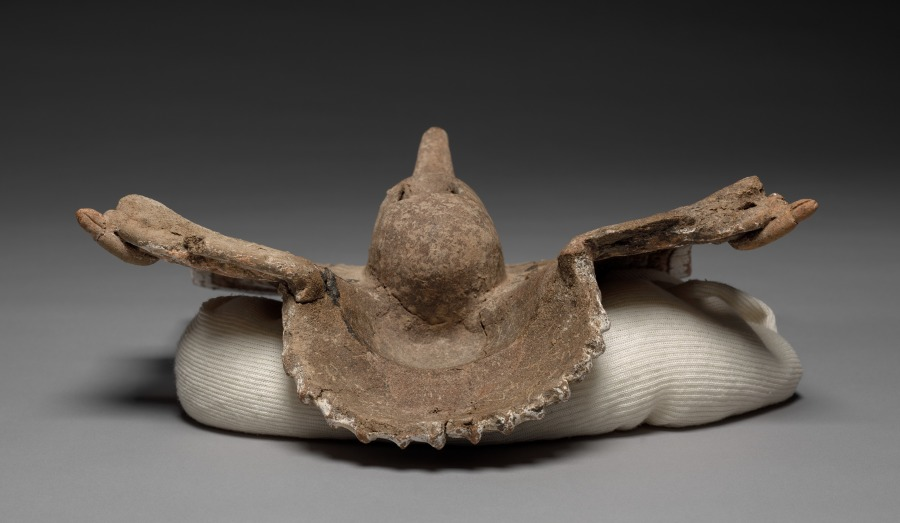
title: Standing Female Figure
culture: Mesoamerica, Veracruz, Nopiloa style?, 7th-10th century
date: 600–1000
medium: ceramic, pigment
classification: Sculpture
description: Ancient Veracruz artists used ceramic to create figural sculptures in a range of sizes, styles, and types. This beautiful, finely wrought female figure is an exceptional example. Although her identity is unknown, her adornments signal high status: ear ornaments, a large necklace, an elaborate dress that drapes over her outstretched arms, and perhaps even her front teeth, filed into a T shape, may have symbolic importance. The unfinished back, with a tripod support, suggests that the figure was meant to be seen from the front.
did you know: This lovely female’s body is a flat plaque supported by a tripod at the rear.